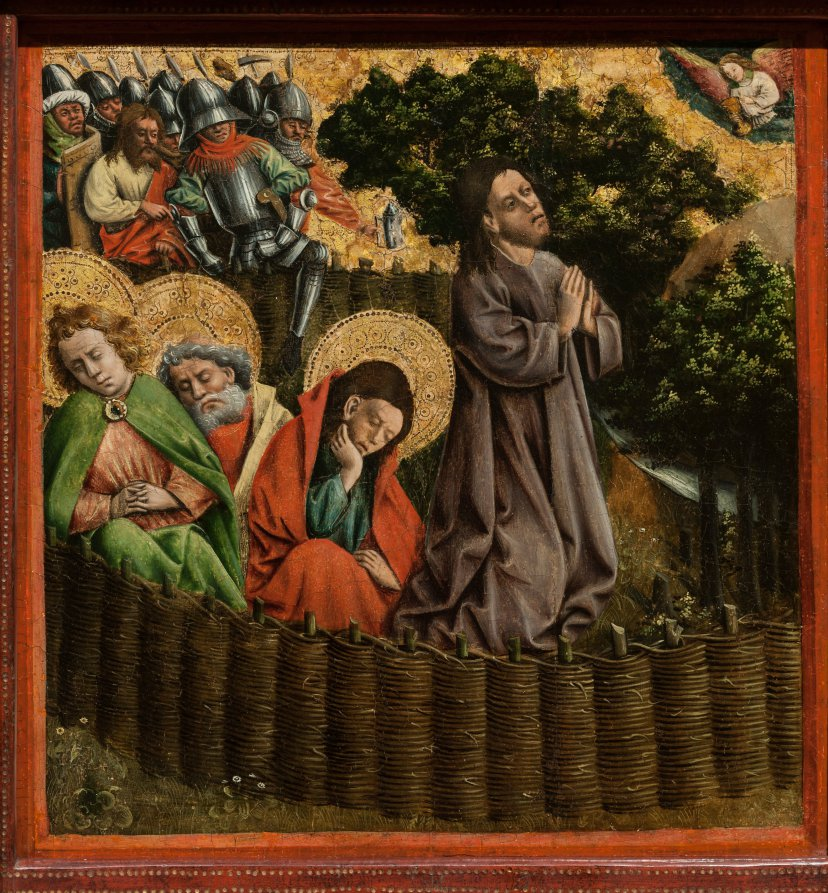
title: Altarpiece with The Passion of Christ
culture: Germany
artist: Master of the Schlägl Altarpiece (German)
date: c. 1440s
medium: oil and gold on wood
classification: Painting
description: The visual focus of this altarpiece is the suffering and death of Christ on the cross. So-called Passion cycles in art include the events leading up to and following the Crucifixion, not only as single subjects but as scenes meant to be read in sequence. Passion cycles were promoted by the two great teaching orders, the Franciscans and the Dominicans, for whom this subject represented the main religious drama of their churches, and also by the German mystics who advocated private contemplation on the humanity and suffering of Christ. The original context for this altarpiece remains unknown, but it was probably made for a religious institution in Westphalia in the Rhine Valley. During the 1870s it was given to the Abbey of Schlägl, near Linz in Upper Austria, from which both altarpiece and artist take their names. The altarpiece is not preserved today in its original format, and some of the individual scenes are missing. Scholars continue to debate the original number of scenes and their sequencing; nine of the original panels have survived.